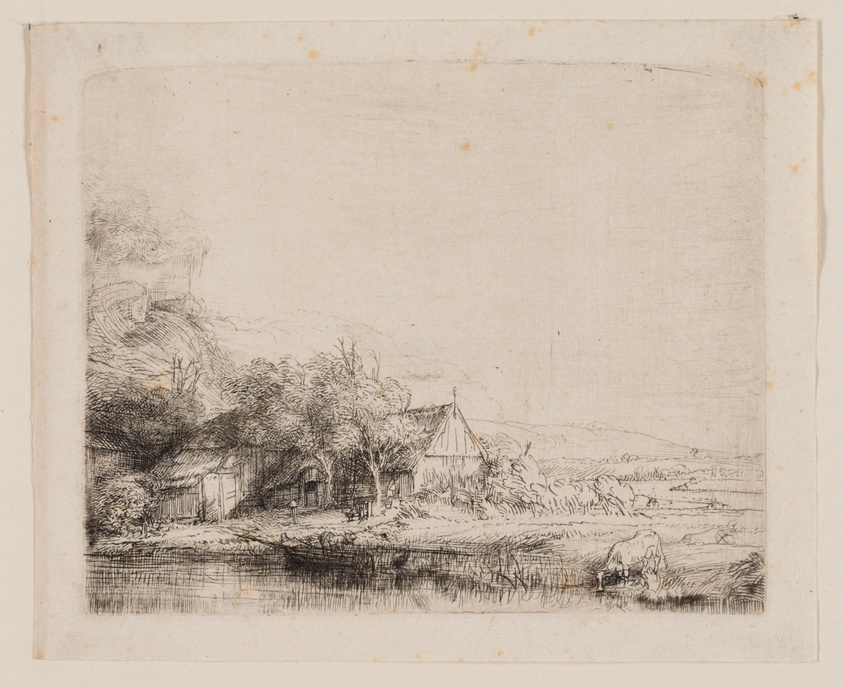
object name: Print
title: Landscape with a Cow Drinking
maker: Rembrandt van Rijn (Dutch, 1606-1669)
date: c. 1650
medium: Etching and drypoint on ivory laid paper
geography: Holland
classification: etching; print; prints and drawing; paper; drypoint